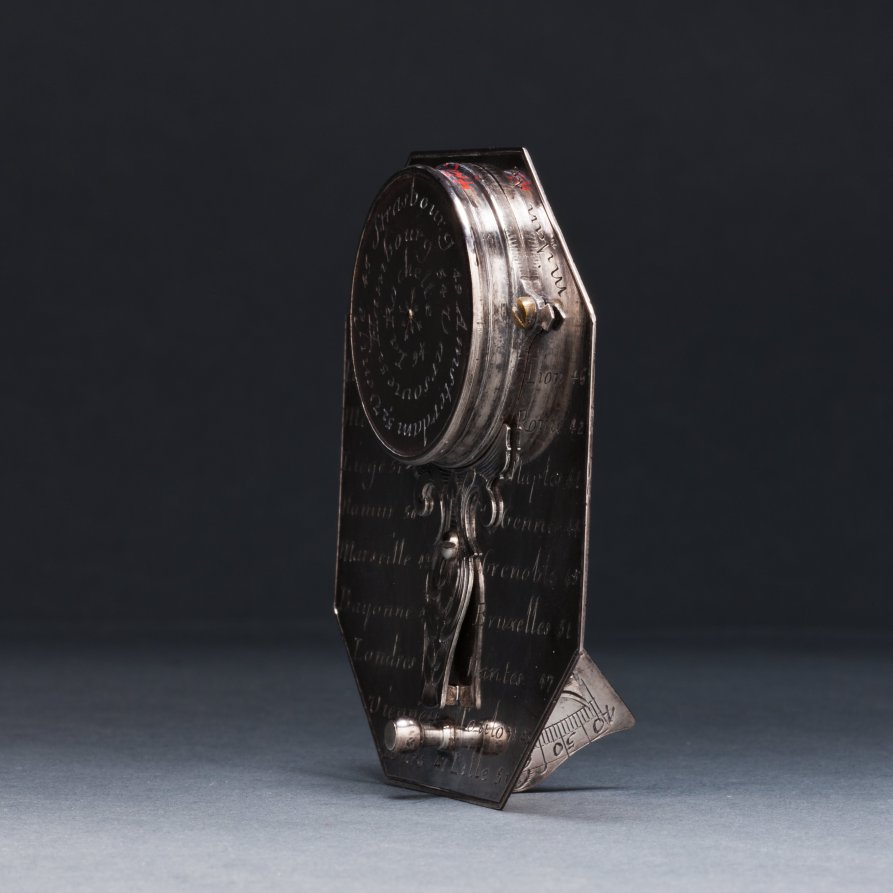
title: Butterfield Sundial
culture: France, 18th century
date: 1700s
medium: silver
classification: Silver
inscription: [Engraved signature above the compass in ribbon band]: "N. BION A Paris"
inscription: [Engraved on the face of the sundial]: “Pour 55° 4-5-6-7-8-9-10-11 50° IIII-V-VI-VII-VIII-IX-X-XI 45° 5-6-7-8-9-10-11 40° -VI-VII-VIII-IX-X-XI'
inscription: [Engraved on the other side]: "Pour 55° -8-7-6-5-4-3-2-1-0 50°-VIII-VII-VI-V-IIII-III-II-I 45°-8-7-6-5-4-3-2-1 40°-VII-VI-V-IIII-III-II-I"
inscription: [Engraved around the compass]: “NORD-OUEST-SUD-EST”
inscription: [Engraved on the back of the sundial]: “Turin 44 Milan 46 Paris 49 Lion 46 Metz 49 Rome 42 Liege 51 Naples 44 Namur 50 Gennes 44 Marseille 43 Grenoble 45 Bayonne 43 Bruxelle 51 Londres 52 Nantes 47 Vienne 48 Toulon 43 Tours 47 Lille 51”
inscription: [Engraved around the back of the compass]: “Venise 45 Strasbourg 49 Amsterdam 52 Hambourg 54 Varsovie 52 La Rochelle 46”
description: Butterfield-type sundials are characterized by their adjustable gnomons, metal flaps that cast a shadow on the dial’s face to indicate the hour, and geographical indices. This sundial has a scale adjustable between latitudes of 40° to 60° north. The latitudes of 26 European towns are engraved on its back for quick reference. With an intricately engraved silver face, it would have functioned as a fashionable traveler’s accessory.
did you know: Butterfield-style sundials were named after Micheal Butterfield, an English scientific and mathematical instrument maker who worked in Paris between 1674 and 1724.